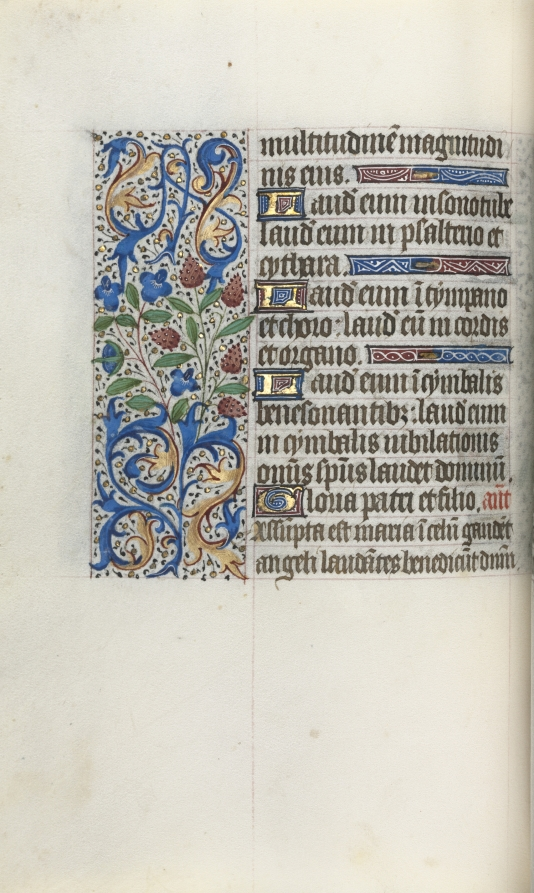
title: Book of Hours (Use of Rouen): fol. 46v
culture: France, Rouen, 15th century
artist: Master of the Geneva Latini (French, active Rouen, 1460–80)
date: c. 1470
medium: ink, tempera, and gold on vellum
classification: Bound Volume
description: In the late 1400s and early 1500s Rouen was an established and important center of book production. The city’s cathedral had a wealthy chapter that spent large sums of money to commission books and to maintain its extensive library. The stationers and booksellers would have likely been concentrated in or near the cathedral precinct. This artist, named after a manuscript now in Geneva, was Rouen’s principal illuminator during the second half of the 1400s.